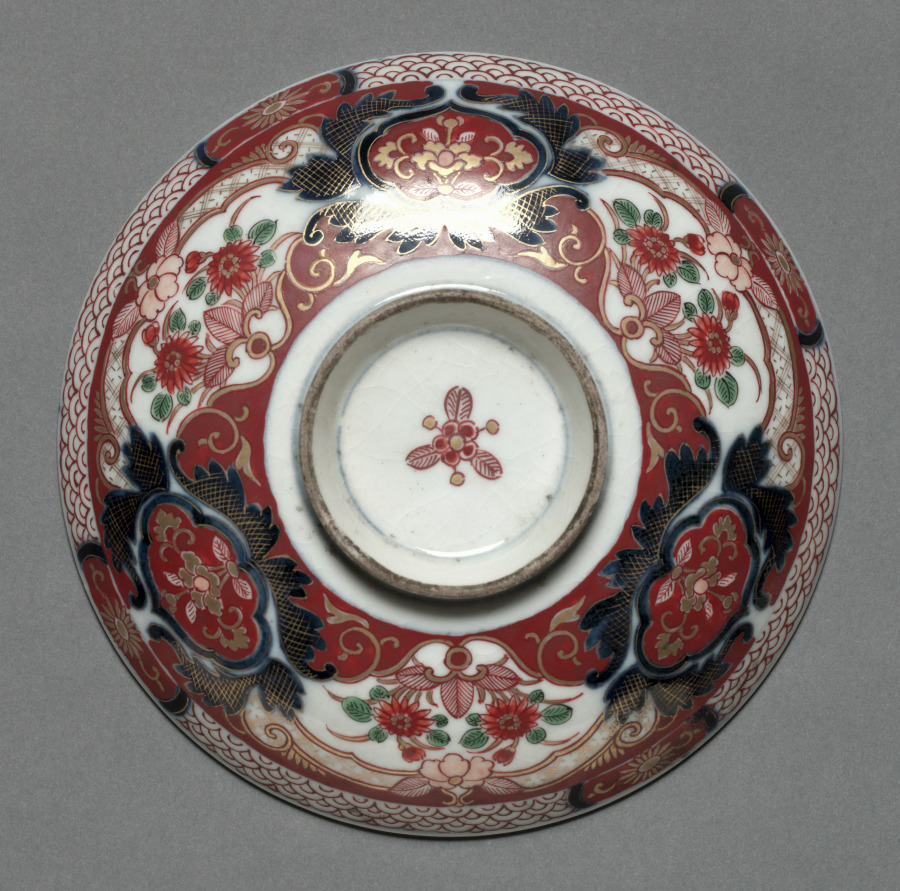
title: Covered Bowl (lid)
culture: Japan, Edo period (1615–1868)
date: early to mid-1800s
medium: white porcelain with underglaze blue, overglaze enamel and gold decoration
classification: Ceramic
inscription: four characters in blue circle on base, translate as: "Wealth Long Spring."